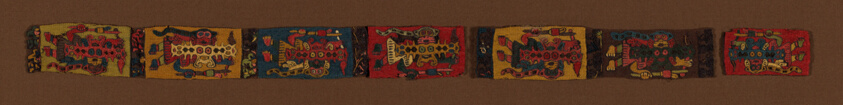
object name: Textile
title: Fragments (Border)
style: nazca, paracas, andean, andes, Pre-Columbian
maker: Nazca; Peru, south coast, Nazca Valley, Coyungo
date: 100 B.C./A.D. 200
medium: Cotton, plain weave; embroidered with camelid wool and cotton in stem and running stitches.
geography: Peru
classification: textile; needlework (visual works)